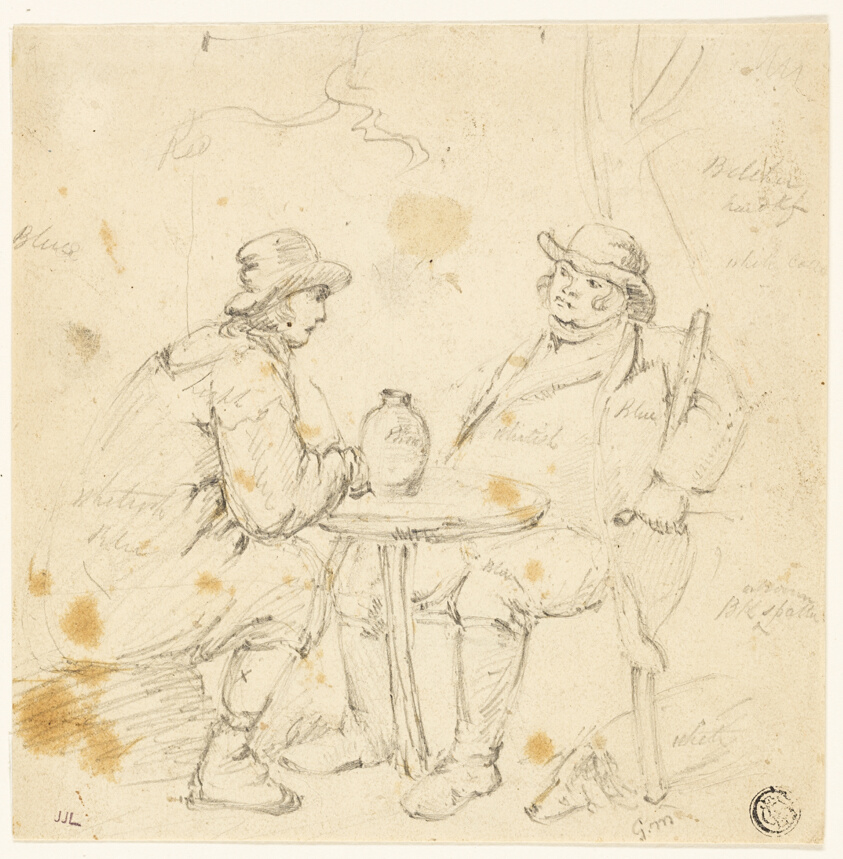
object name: Drawing and Watercolor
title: Two Men at a Table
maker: Possbily after George Morland; English, 1763-1804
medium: Graphite on cream wove paper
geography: England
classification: graphite; drawings (visual works); prints and drawing